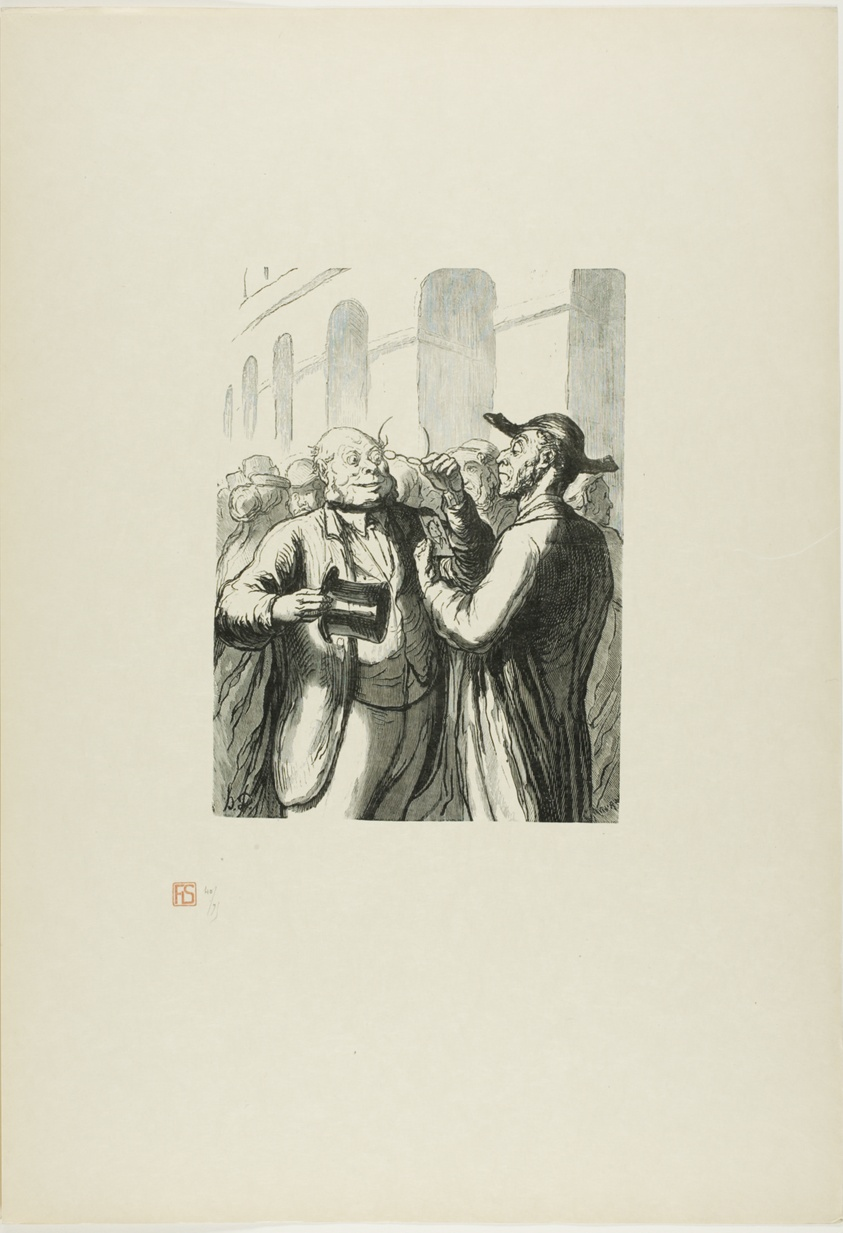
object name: Print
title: At the Universal Exhibition: Security check at the entrance: the bald need to lift their hats, and the the short-sighted need to remove their glasses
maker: Charles Maurand (French, 1824-1904); after Honoré Victorin Daumier (French, 1808-1879); printed by François Louis Schmied (Swiss, 1873-1941); published by Jules Meynial (French, 20th century)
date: 1867, printed 1920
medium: Wood engraving on cream Japanese paper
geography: France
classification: wood engraving; print; prints and drawing